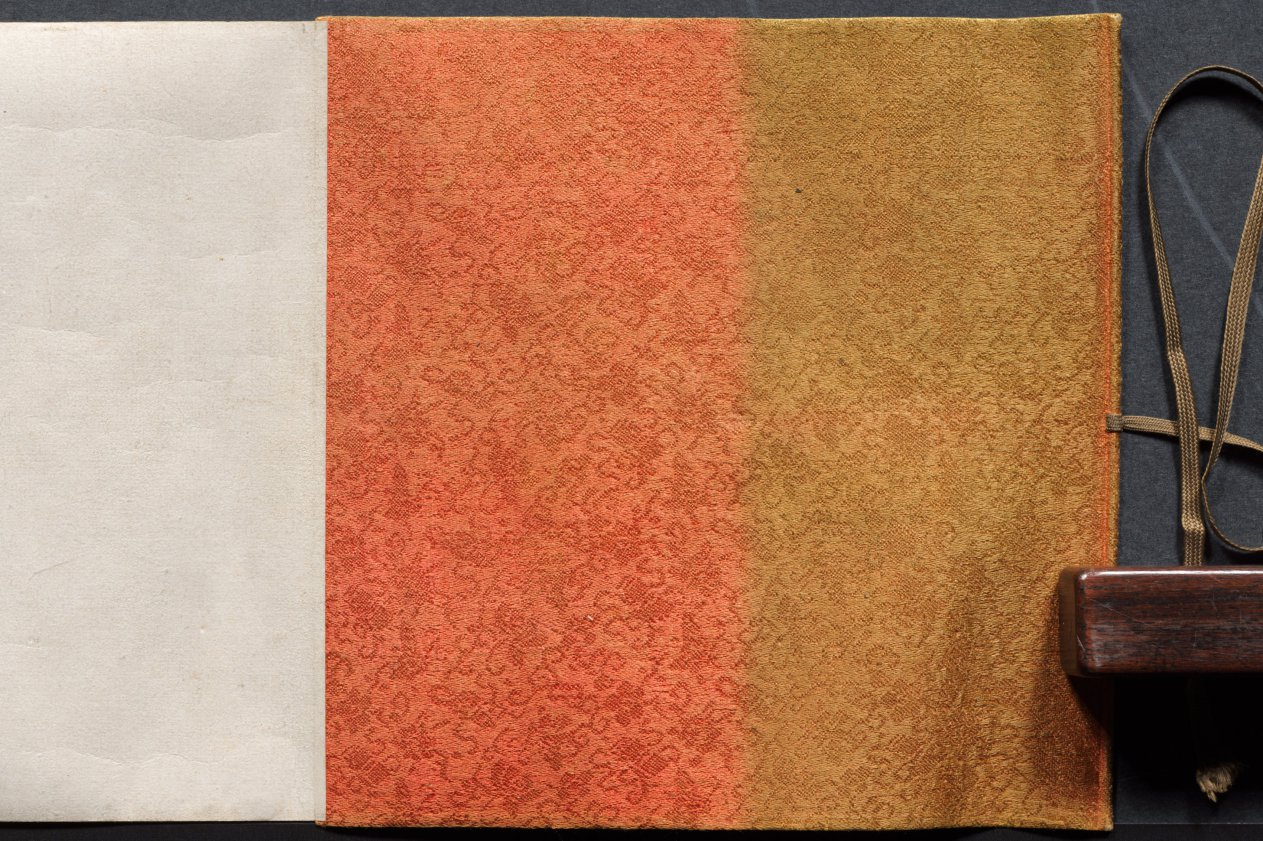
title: The Shadow Dancers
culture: Japan, Edo period (1615–1868)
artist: Yamamoto Baiitsu (Japanese, 1783–1856)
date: 1800s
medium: handscroll, ink and color on silk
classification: Painting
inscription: artist's signature and two seals at end of painting.